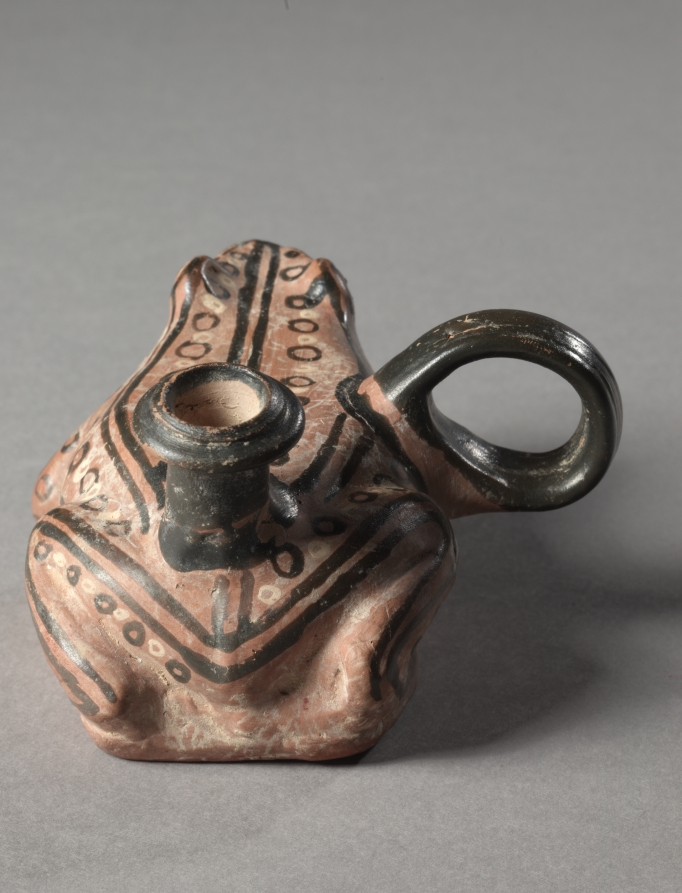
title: Frog-Shaped Guttus (Oil Flask)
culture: South Italian, Apulian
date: 300s BCE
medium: ceramic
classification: Ceramic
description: Guttus is a Latin word referring to a small vessel with vertical spout and ring handle, probably used for pouring small amounts of precious liquids. Often, mold-made ceramic gutti take the form of animals, with realistic painted decoration. Here, the lifelike frog features black stripes and alternating black and white circles.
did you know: The philosopher Plato famously compared the Greeks living along Mediterranean coastlines to “frogs around a pond.”